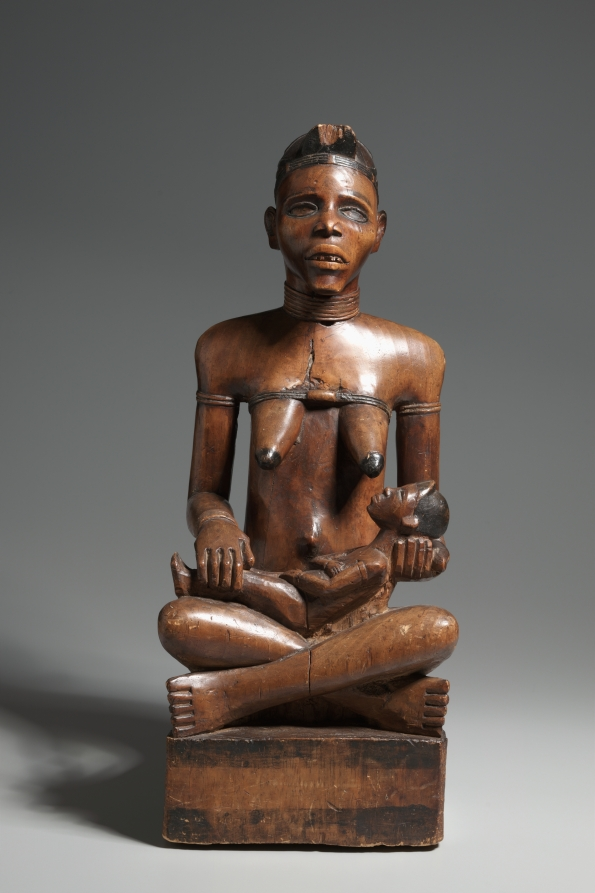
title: Mother and Child Figure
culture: Africa, Central Africa, Democratic Republic of Congo (most likely), Cabinda, or Republic of the Congo, probably Yombe-style maker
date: late 1800s–early 1900s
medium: Wood and paint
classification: Sculpture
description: This Mother and Child Figure is attributed to the Yombe peoples, who inhabit a large territory now divided among the nations of Congo, Democratic Republic of Congo, Zambia, and Angola. Its origin has been traced to the areas surrounding the village of a master carver in the western Democratic Republic of Congo, where similarly carved objects were collected in the early 20th century. Its naturalism suggests that it could have been the portrait of a real person, and thus an excellent testimonial to the immense talent of the artist who carved it. Once referred to as the “Burniaux maternity figure,” after the Belgian collector F. Burniaux, who owned it from about 1930 to 1980, the sculpture was acquired by the Cleveland Museum of Art in 1998.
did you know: The sculpture may have been carved in honor of a woman after her death, or after the death of a male chief. Kongo society is matrilineal, so the chief's right to political power is inherited through the female line.